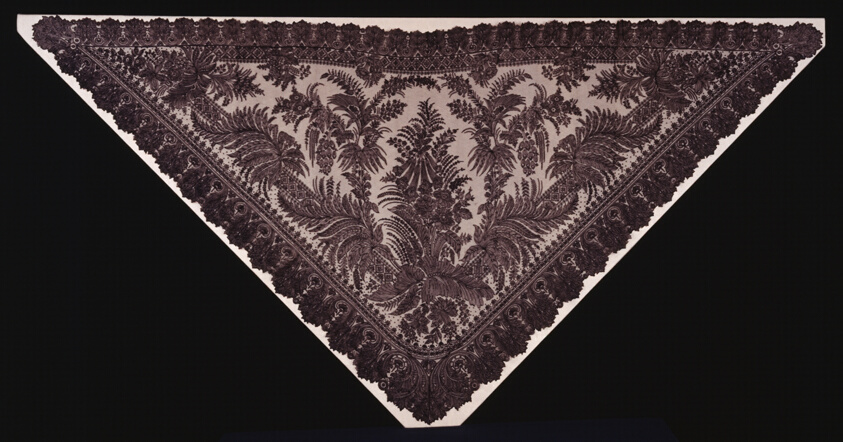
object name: Textile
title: Half Shawl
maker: France, Bayeux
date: Early 1860s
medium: Silk, bobbin straight lace (made in vertical strips)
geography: France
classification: textile; lace - bobbin; lace